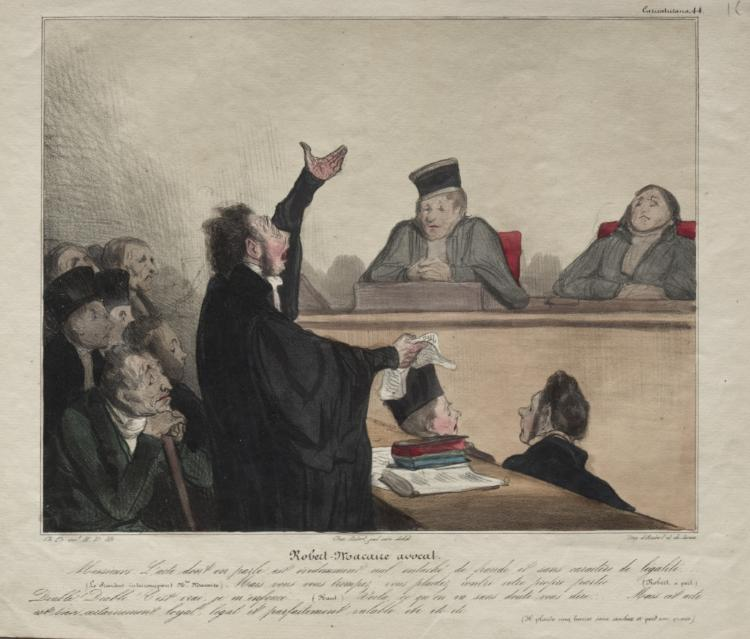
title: Robert-Macaire, lawyer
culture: France, 19th century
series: Caricaturana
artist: Honoré Daumier (French, 1808–1879)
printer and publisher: Aubert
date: 1837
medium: lithograph, hand colored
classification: Print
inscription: Upper margin, pencil: II SAJ ; lower margin, printed: Ch. Ph. invt. H. D. lith / Chez Aubert, gal. vèro dodat. / Imp. d'Aubert et de Junca ; pencil: Del.II.399, only state ; Verso, pencil: # 15 / 8011/15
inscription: Above image, printed: Caricaturana, 44 ; Below image, printed: Robert-Macaire avocat. / Messieurs: L'acte dont on parle est évidemment nul, entaché de fraude et sans caractètre de légalité.... / ....... (Le Président interrompant Mtre. Macaire). Mais vous vous trompez, vous plaidez contre votre propre partie..... (Robert, à part) / Diable! Diable! C'est vrai, je m'enfonce..... (Haut.) Voilà, ce qu'on va sans doutre vous dire..... Mais cet acte / est bien certainement loyal, légal et parfaitement valable. etc. etc. etc. / (Il plaide cinq heures sans cracher et perd son proces.)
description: This print was published in Le Charivari (April 23, 1837) as plate 44 from the series Caricaturana.